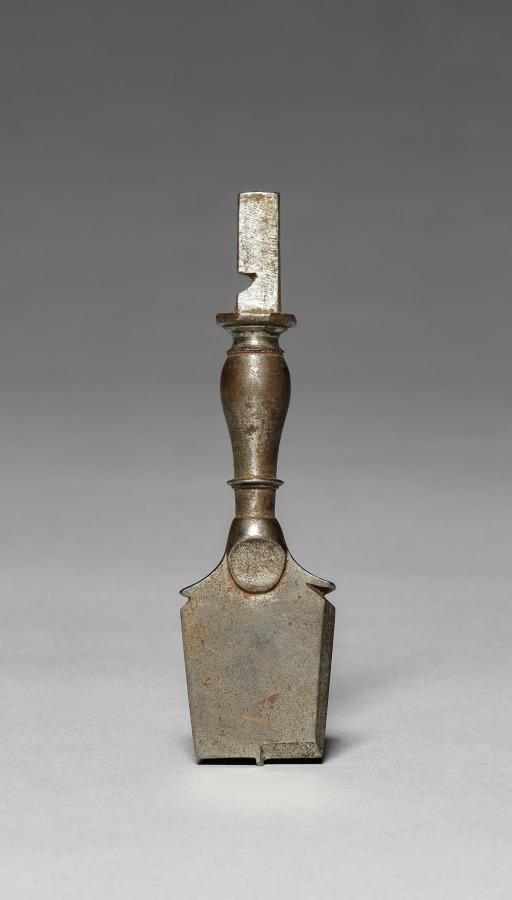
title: Brace (Bit)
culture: Europe, 17th-18th century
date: 1600s–1700s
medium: metal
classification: Tool